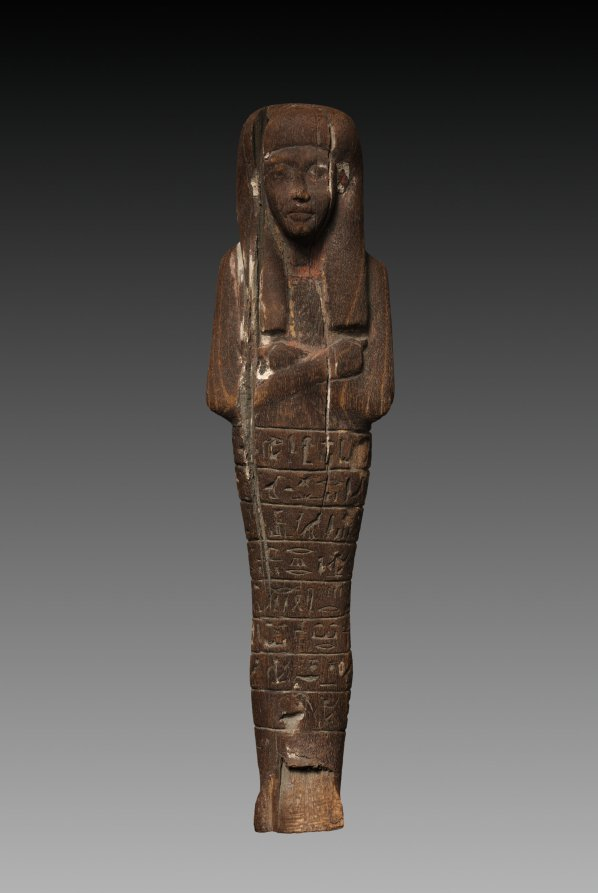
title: Shawabty of the Scribe Seti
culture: Egypt, New Kingdom (1540–1069 BCE), Dynasties 18–19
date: 1350–1250 BCE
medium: painted wood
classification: Funerary Equipment